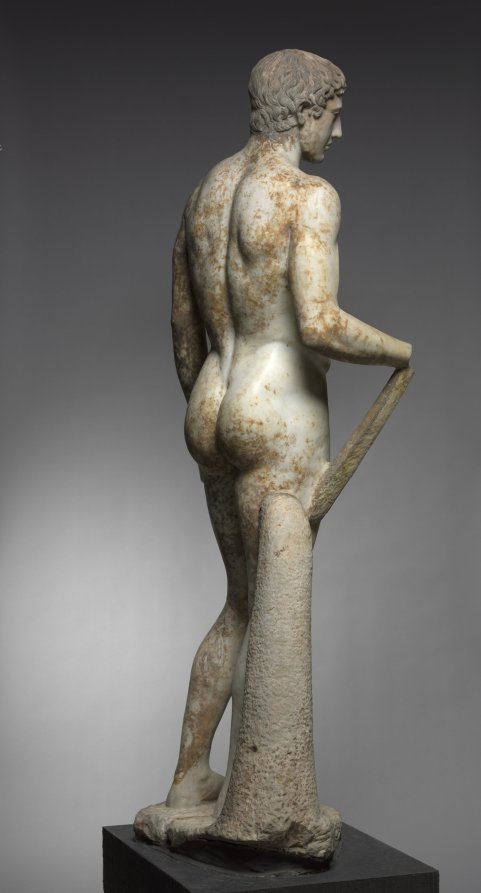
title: Statue of an Athlete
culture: Italy, Roman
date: 1–100 CE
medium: marble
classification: Sculpture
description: This idealized athlete recalls Greek sculptural types invented and popularized during the 400s BC. Large-scale athletes and other sculptures like this were originally created by famous artists as sanctuary dedications. Centuries later, they were widely copied and adapted by Roman sculptors, whose clients sought their own versions of earlier masterpieces. Working in marble rather than bronze, these sculptors added certain elements for stability, such as the struts and the large tree trunk beside the right leg here. Sculptures like this one are profoundly complex, made by and for Romans but descended from Greek ancestors.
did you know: For many years, this sculpture stood in the rotunda of the Cleveland Museum of Art.